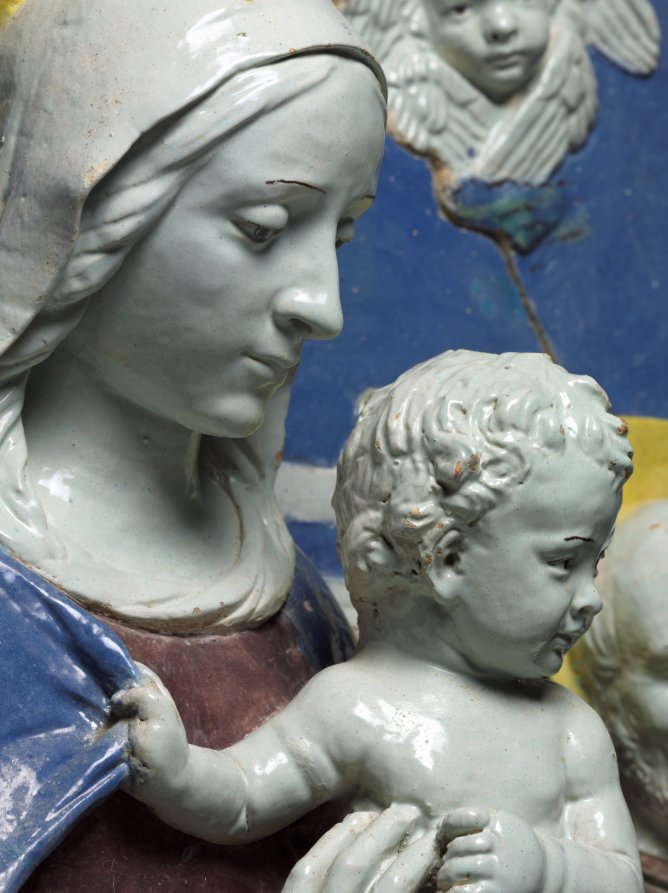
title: Virgin and Child Enthroned with Saints Francis and Giovanni Gualberto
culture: Italy, Florence, 16th century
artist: Benedetto Buglioni (Italian, 1461–1521)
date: c. 1510–20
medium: glazed terracotta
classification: Sculpture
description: The Madonna sits upon a throne with the Christ child standing on her knee. He is steadied by his mother, turning delicately to grasp her robe for support. On the left is Saint Francis, identified by his stigmata. On the right, Saint Giovanni Gualberto is identified by his monk's robe and distinctive processional cross. The brown robes of the saints, the purple of the Virgin's tunic, and the flesh tones of the figures contrast strongly against the bright blue background. In the semicircular sky behind the figures, three winged cherub heads emerge, representing a host of angels. Glazed terracotta is both durable and decorative and the gleaming white of this piece would have stood out in the darkness of a church. The medium was made popular by Renaissance artist Luca della Robbia and came into fashion as a substitute for expensive carved marble. A rounded arch frame embellished with fruit and flower garlands as well as egg-and-dart and cord moldings accompanied the work when it was acquired, but was later determined not to be original and removed. Buglioni's work bears the influence of the della Robbias, particularly in the simple color scheme. Buglioni likely worked in the studio of Luca's nephew, Andrea, where he would have learned the technique of glazing terracotta.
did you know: The unusual purple hue is particular to the artist.